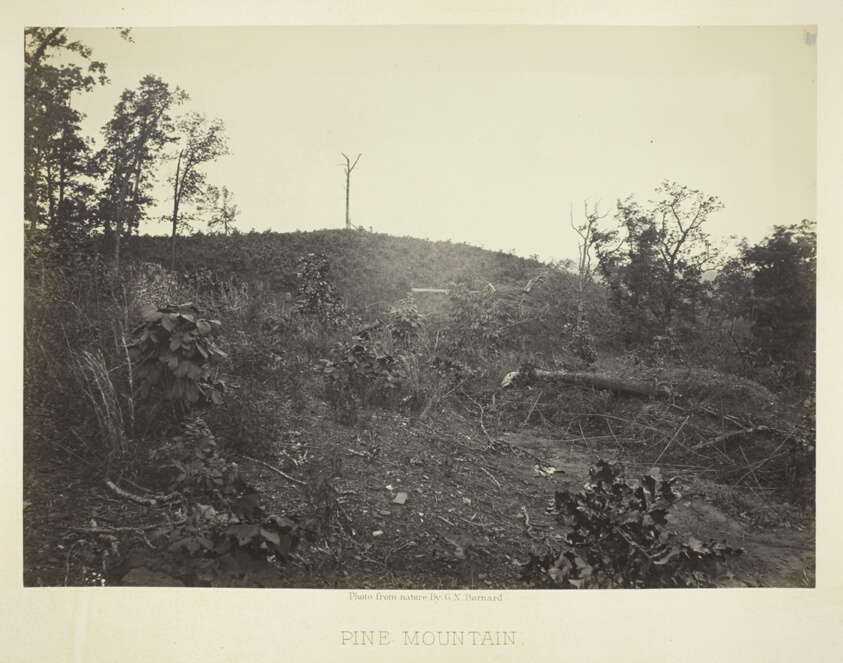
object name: Photograph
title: Pine Mountain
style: 19th century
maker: George N. Barnard (American, 1819–1902)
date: 1866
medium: Albumen print, plate 30 from the album "Photographic Views of the Sherman Campaign" (1866)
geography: United States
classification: albumen silver print; photographic process; photography; photograph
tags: Collected by Hugh Edwards, Sherman's Campaign 1866